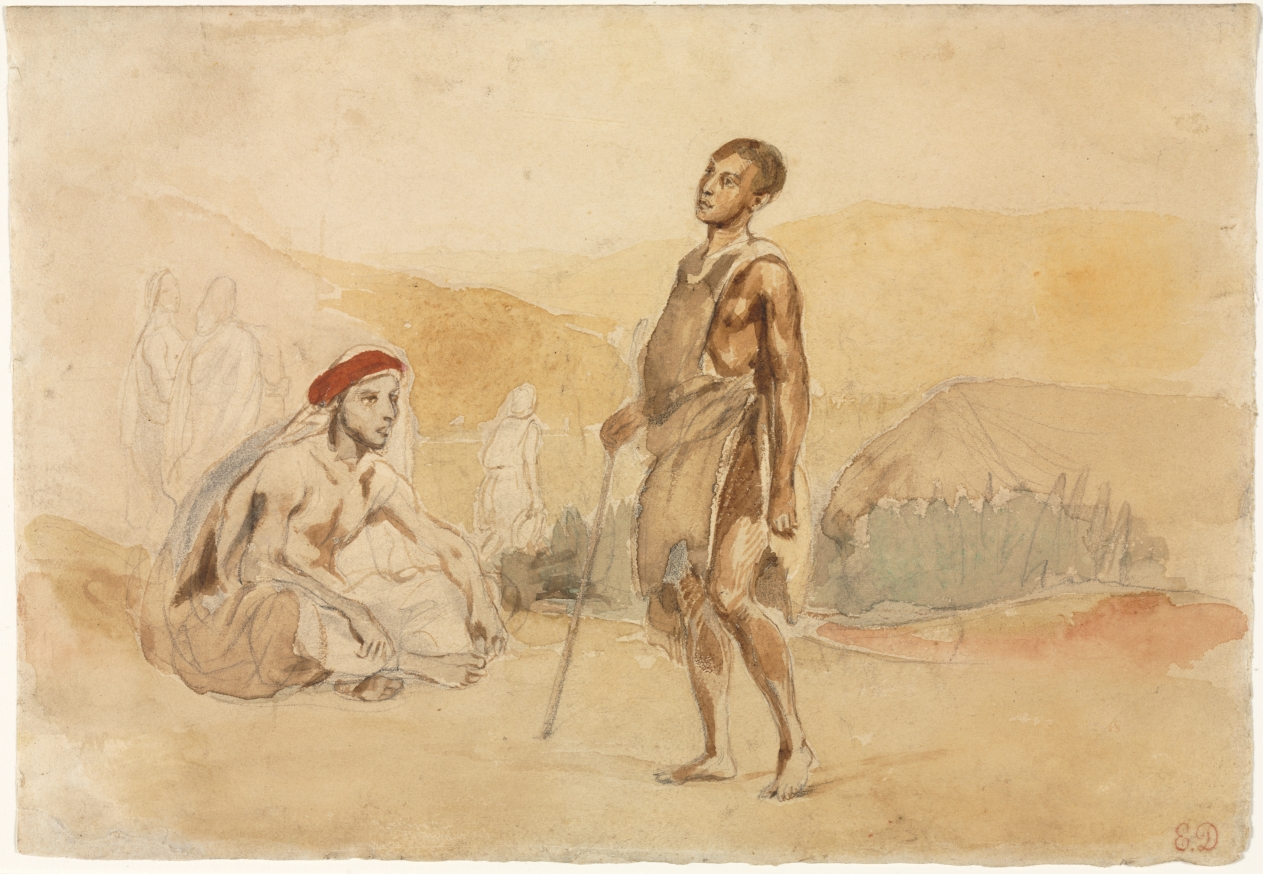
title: Moroccans in the Countryside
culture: France, 19th century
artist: Eugène Delacroix (French, 1798–1863)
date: 1832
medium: watercolor over graphite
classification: Drawing